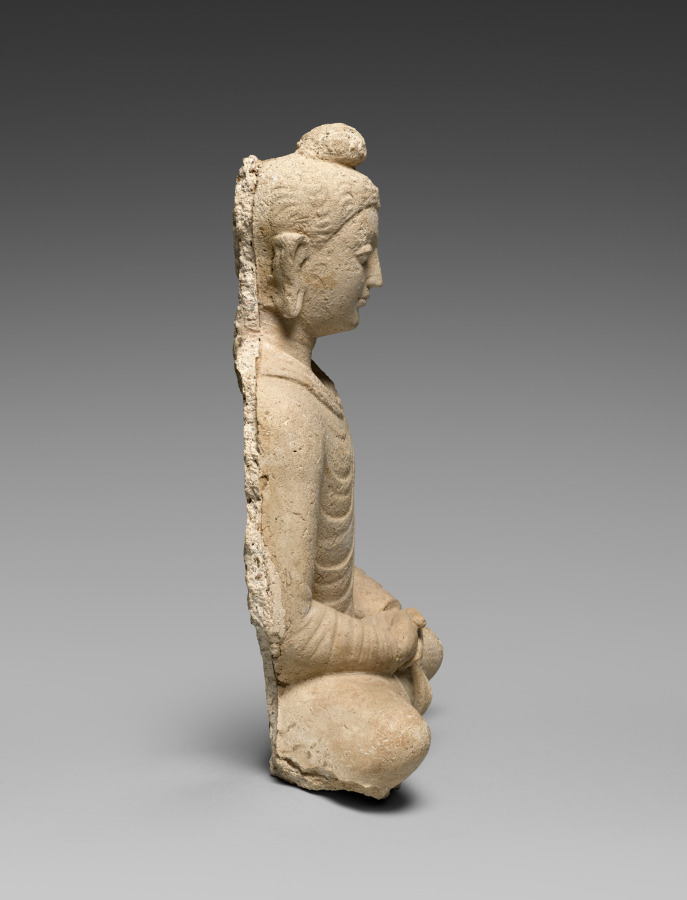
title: Seated Buddha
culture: Afghanistan, Hadda, probably Tape Shotor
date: c. 300 CE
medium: stucco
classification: Sculpture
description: Multiple images of seated Buddhas and related figures surrounded monuments called stupas that enshrined sacred relics. Made of stucco, which is a lime-based plaster material, the backs of the sculptures were fixed to the platform on which the hemispherical stupa was constructed. Visitors would see these images as they venerated the stupas by walking around them reverently, in a clockwise direction. The main stupa at Hadda reportedly contained relics of Shakyamuni Buddha, also known as Siddhartha Gautama, the founder of the Buddhism.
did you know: The way the Buddha holds his hands on his crossed legs indicates that he is shown in meditation.